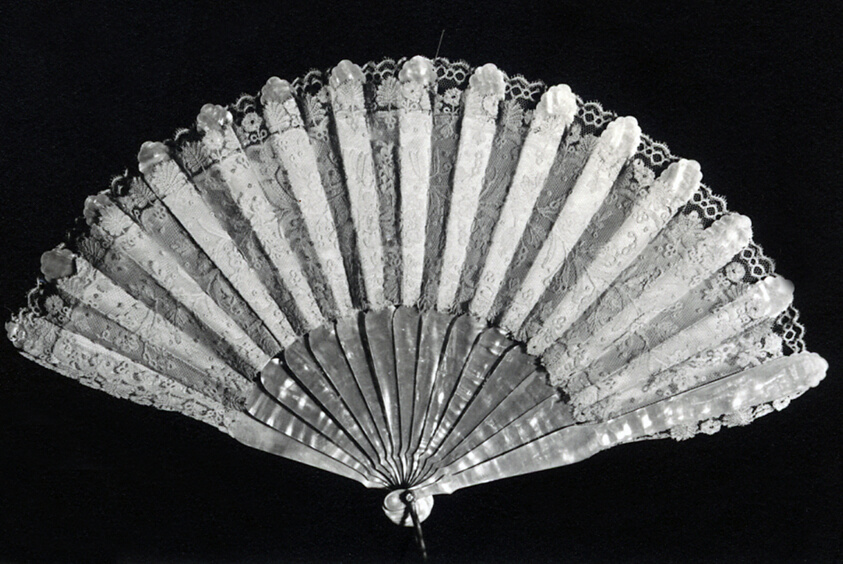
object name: Costume and Accessories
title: Fan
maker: France (lace made in Brussels)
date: 1850/60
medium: Point applique on white taffeta mount; plain pearl sticks and guards; rhinestone rivet; gilt metal loop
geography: France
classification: textile; fan - lace; costume accessory - folding fan; costume